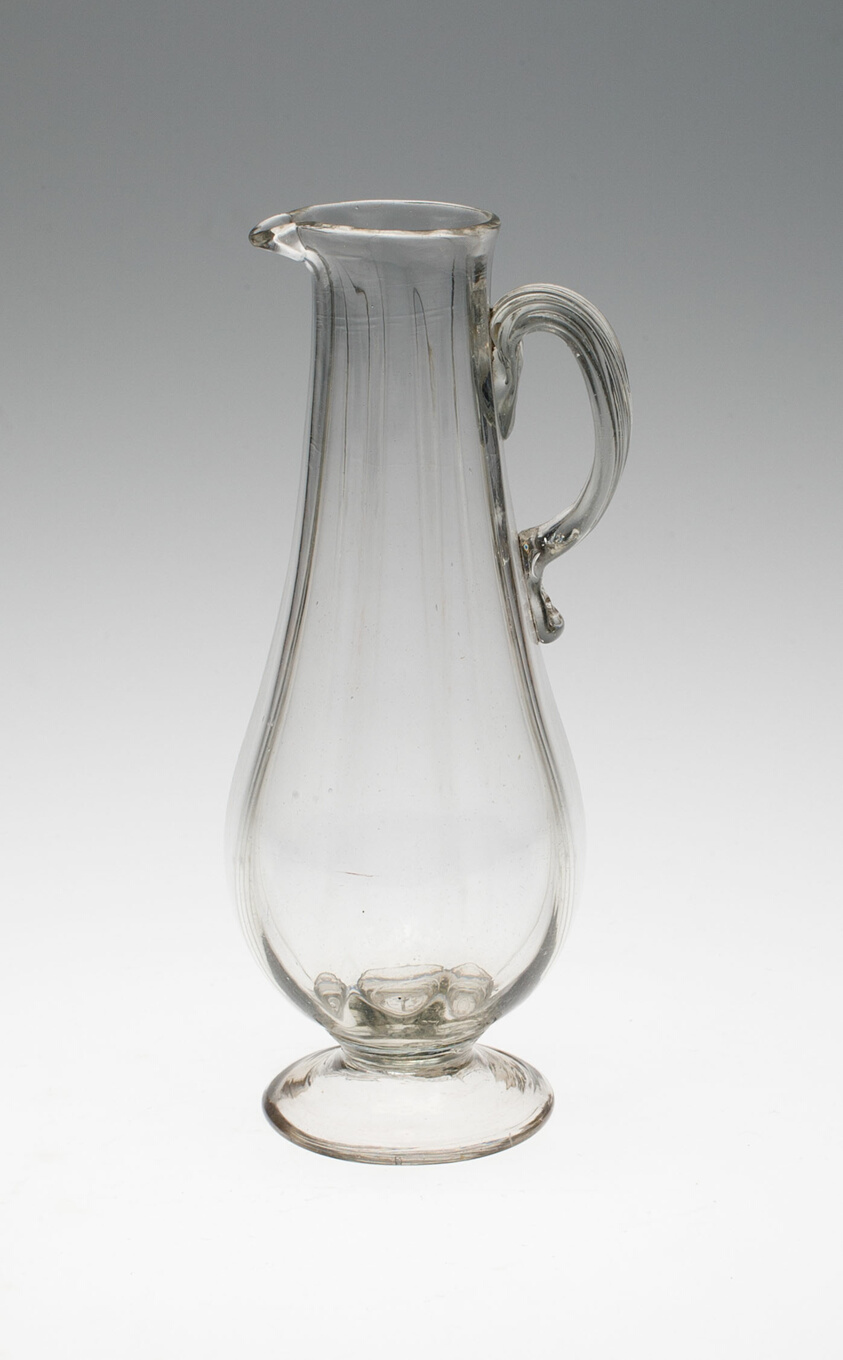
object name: Glass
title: Two Tall Pitchers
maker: France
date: Mid 18th century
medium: Glass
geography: France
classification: pitcher (vessel); glass; vessel; european decorative arts